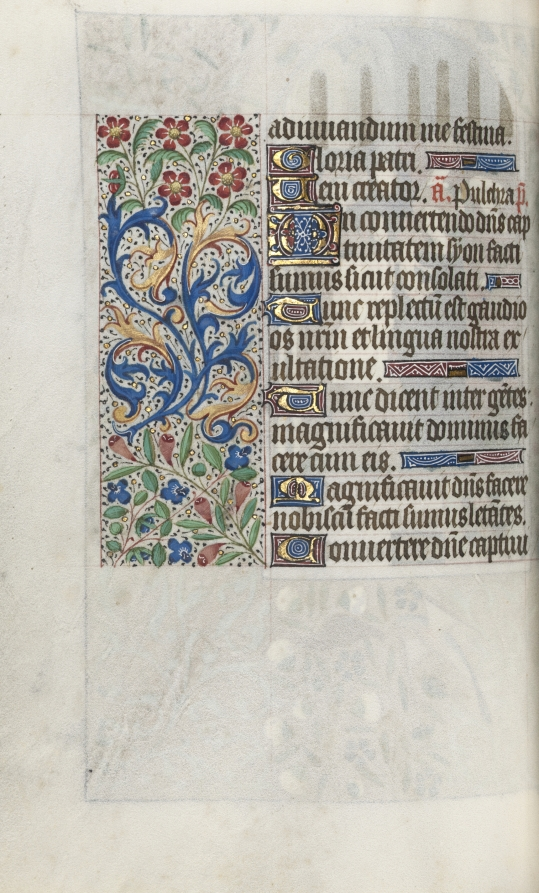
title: Book of Hours (Use of Rouen): fol. 67v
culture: France, Rouen, 15th century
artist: Master of the Geneva Latini (French, active Rouen, 1460–80)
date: c. 1470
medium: ink, tempera, and gold on vellum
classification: Bound Volume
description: In the late 1400s and early 1500s Rouen was an established and important center of book production. The city’s cathedral had a wealthy chapter that spent large sums of money to commission books and to maintain its extensive library. The stationers and booksellers would have likely been concentrated in or near the cathedral precinct. This artist, named after a manuscript now in Geneva, was Rouen’s principal illuminator during the second half of the 1400s.